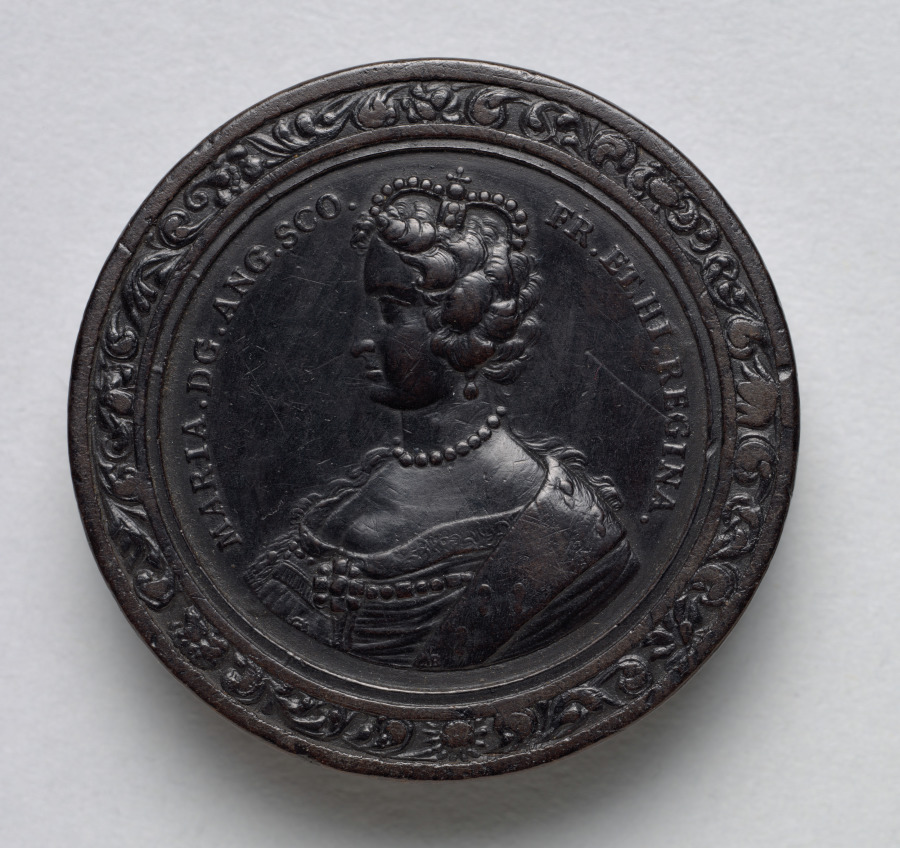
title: Gaming Piece (reverse)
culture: Germany, late 17th-early 18th Century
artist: Martin Brunner (German, 1659–1725)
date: c.1700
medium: wood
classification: Furniture and woodwork